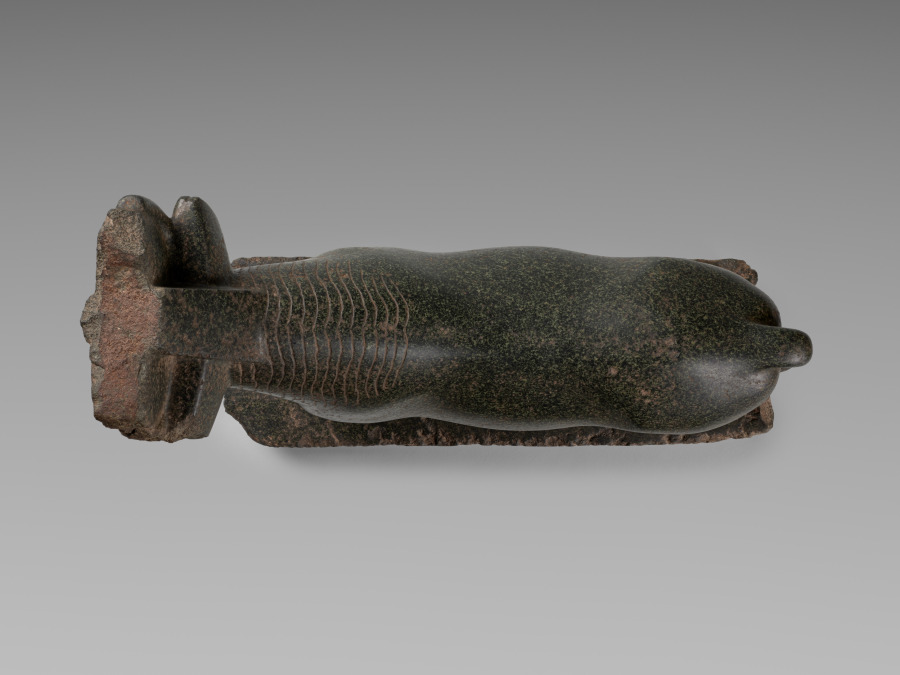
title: Apis Bull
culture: Egypt, Greco-Roman period (332 BCE–395 CE), Ptolemaic dynasty (305–30 BCE)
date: 400–100 BCE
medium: serpentinite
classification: Sculpture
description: Sacred animal cults have a long history in ancient Egypt, but they became even more important in the Ptolemaic and Roman periods. Because each god could incarnate himself into any animal species, beasts of all sorts--dogs, cats, ibises, crocodiles--were protected, venerated, mummified, and collected by the thousands in specialized animal cemeteries. The sacred bull cults were different. Apis, the bull of Memphis, was a god in his own right. But he was also associated with other deities, such as Ptah, the god of Memphis, and Osiris, in the form of Osiris-Apis (or Serapis). Statues and reliefs always show him crowned with a sun disk and cobra. When an Apis bull died, he was given a burial fit for a king in an area of the Memphite cemetery known as the Serapeum.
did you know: A larger base, likely inscribed, may have hidden the rough, unfinished lower edges of this statue.